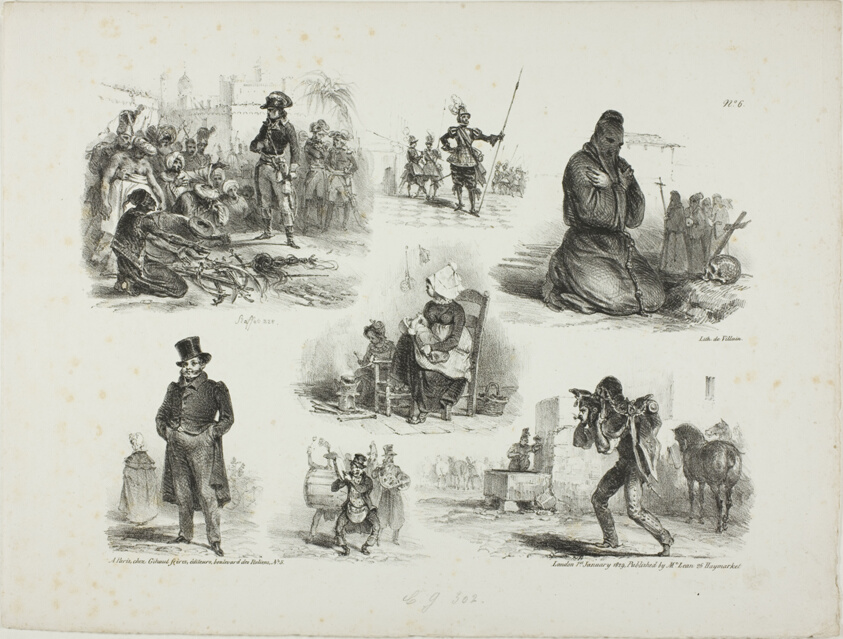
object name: Print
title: Sheet of Sketches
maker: Denis Auguste Marie Raffet (French, 1804-1860); printed by François le Villain (French, active 19th century); published by Chez Gihaut Frères (French, 19th century); published by Thomas McLean (English, active c.1790-1860)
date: 1828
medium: Lithograph in black on ivory wove paper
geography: France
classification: lithograph; print; prints and drawing